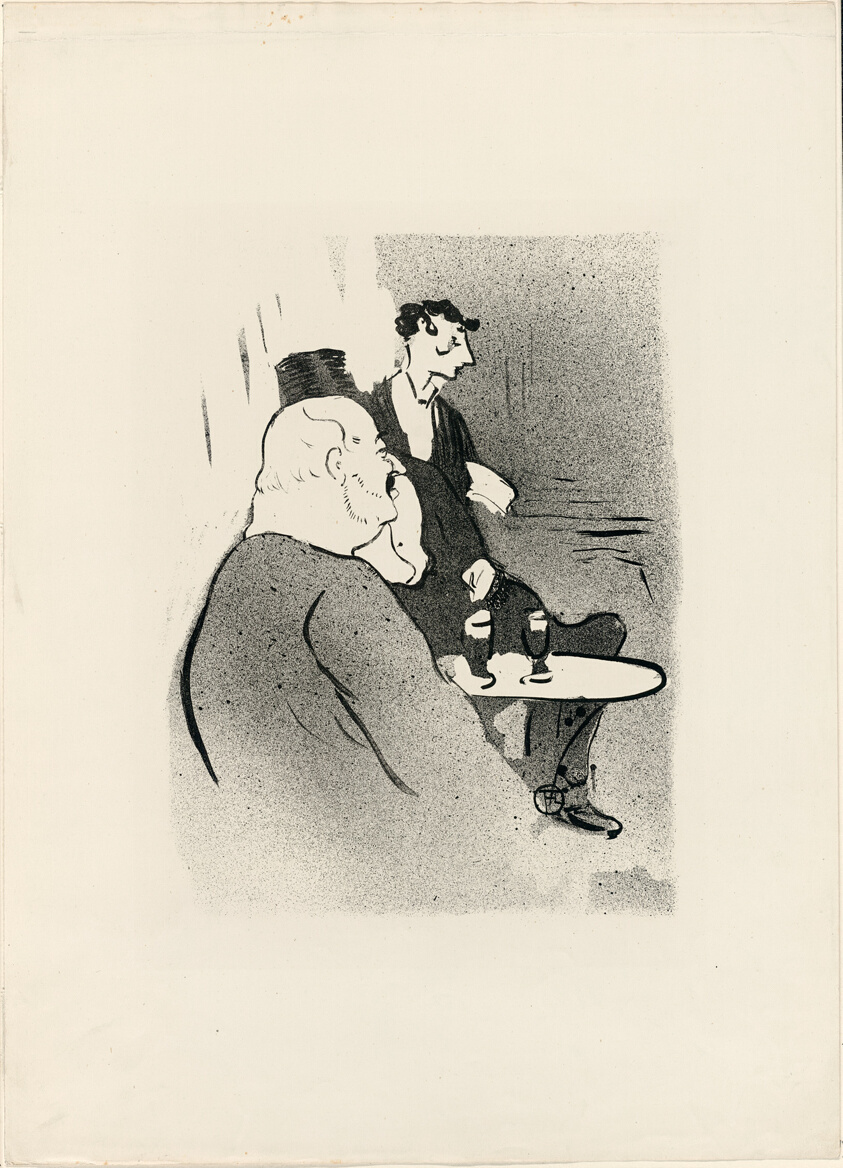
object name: Print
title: Ducarre at the Ambassadeurs, from Le Café-Concert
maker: Henri de Toulouse-Lautrec (French, 1864-1901); printed by Edward Ancourt & Cie (French, 19th-20th c.); published by L'Estampe originale (French, 1893-1895)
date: 1893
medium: Lithograph on ivory wove paper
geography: France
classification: lithograph; print; prints and drawing